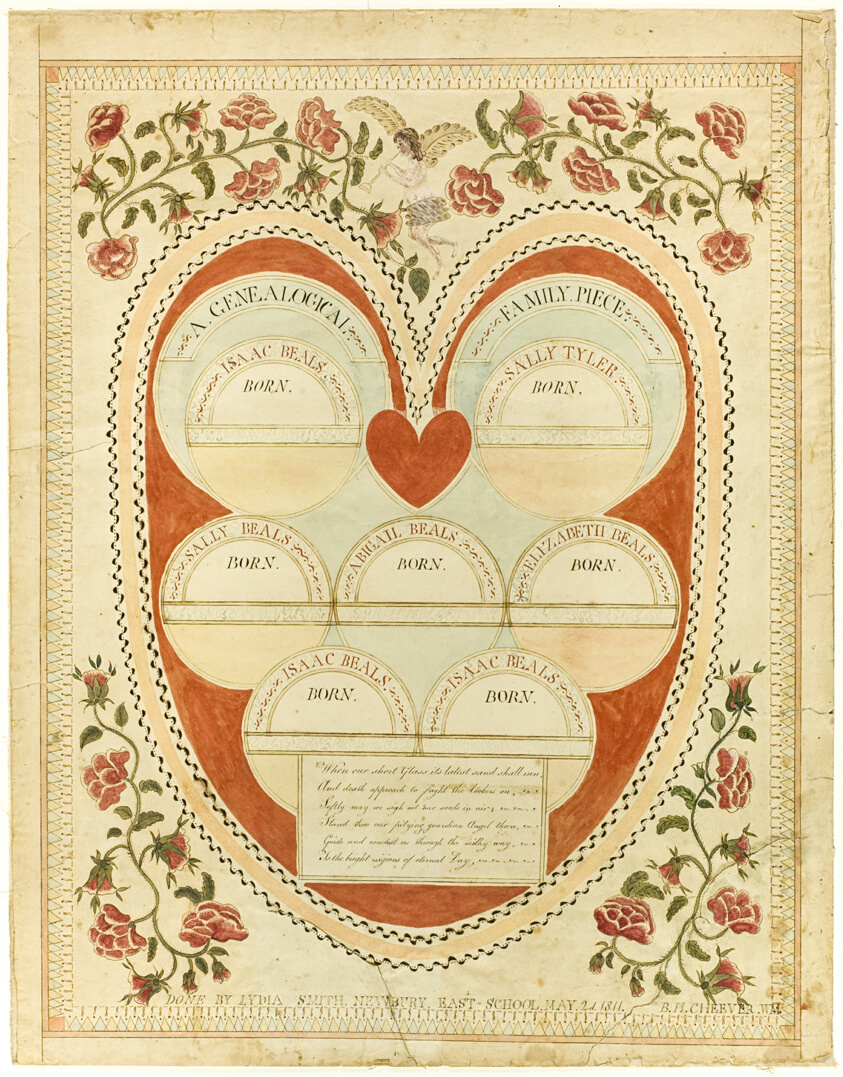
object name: Drawing and Watercolor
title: A Genealogical Family Piece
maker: Lydia Smith (American, active 19th century)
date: 1811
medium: Watercolor and pen and brown ink, with lead white gouache (discolored), on cream wove paper, laid down on fabric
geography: United States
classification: watercolor; drawings (visual works); prints and drawing